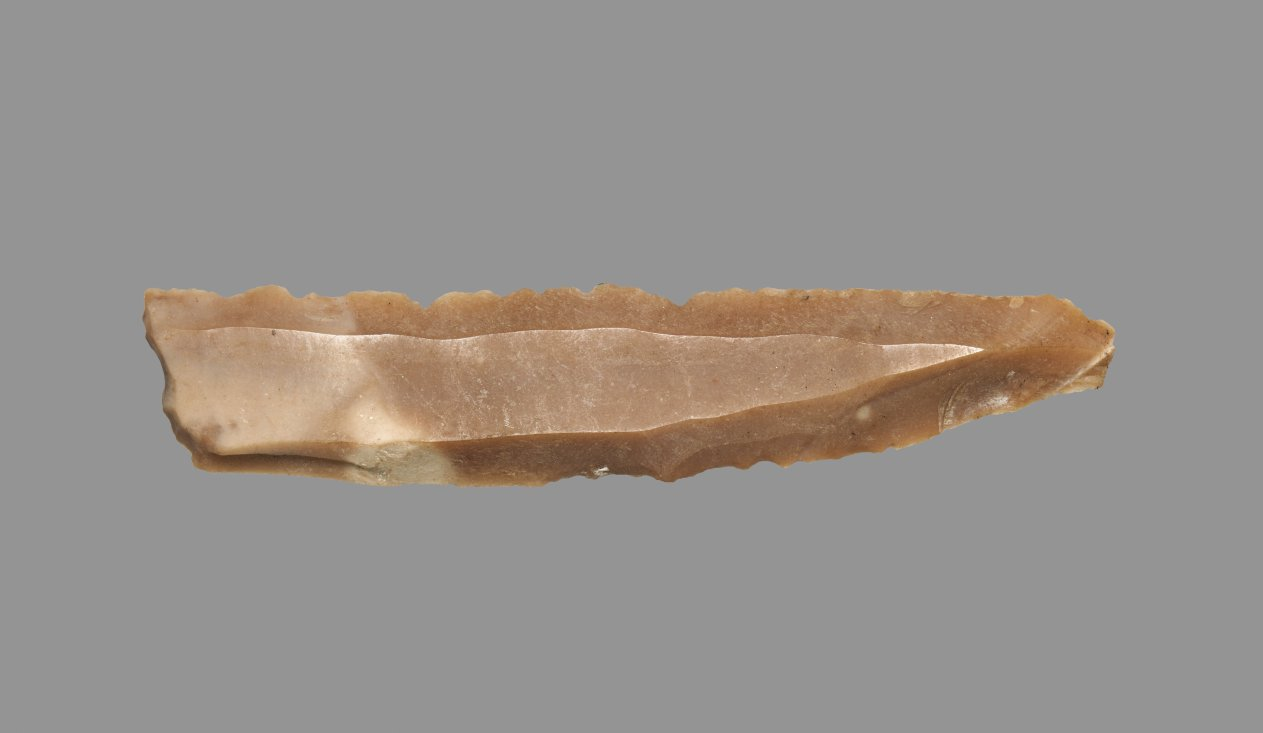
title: Sickle Blade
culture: Egypt, Middle Kingdom (2040–1648 BCE), Dynasty 12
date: 1980–1801 BCE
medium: flint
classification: Implements